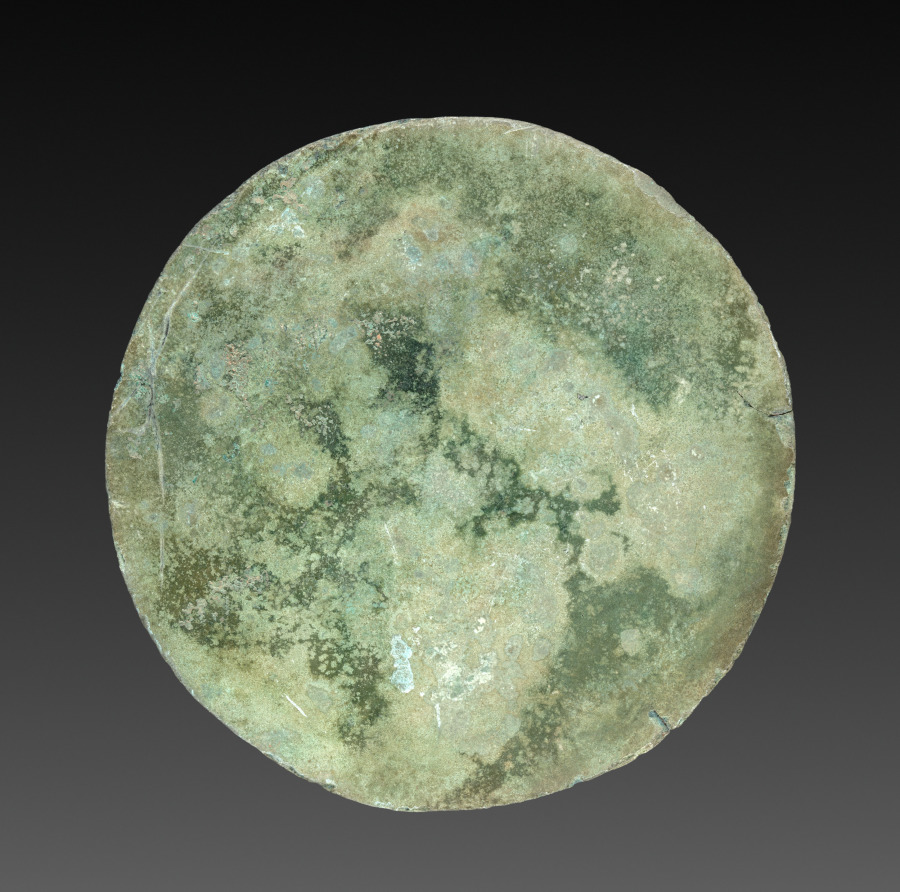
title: Mirror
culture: Japan, Heian period (794–1185)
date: 794–1185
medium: bronze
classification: Metalwork